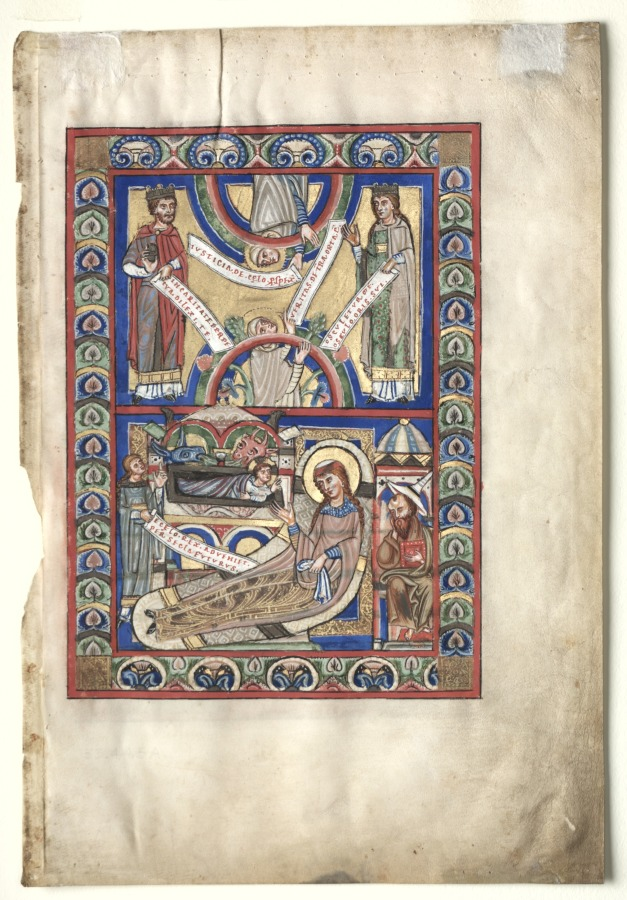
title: Single Leaf Excised from a Gospel Book: The Nativity (recto) and St. Matthew (verso)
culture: Germany, Helmarshausen Abbey, 12th century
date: c. 1190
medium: ink, tempera, silver, and gold on vellum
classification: Manuscript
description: This leaf comes from a volume that is preserved in the Trier Cathedral Library in Germany (Codex 142).